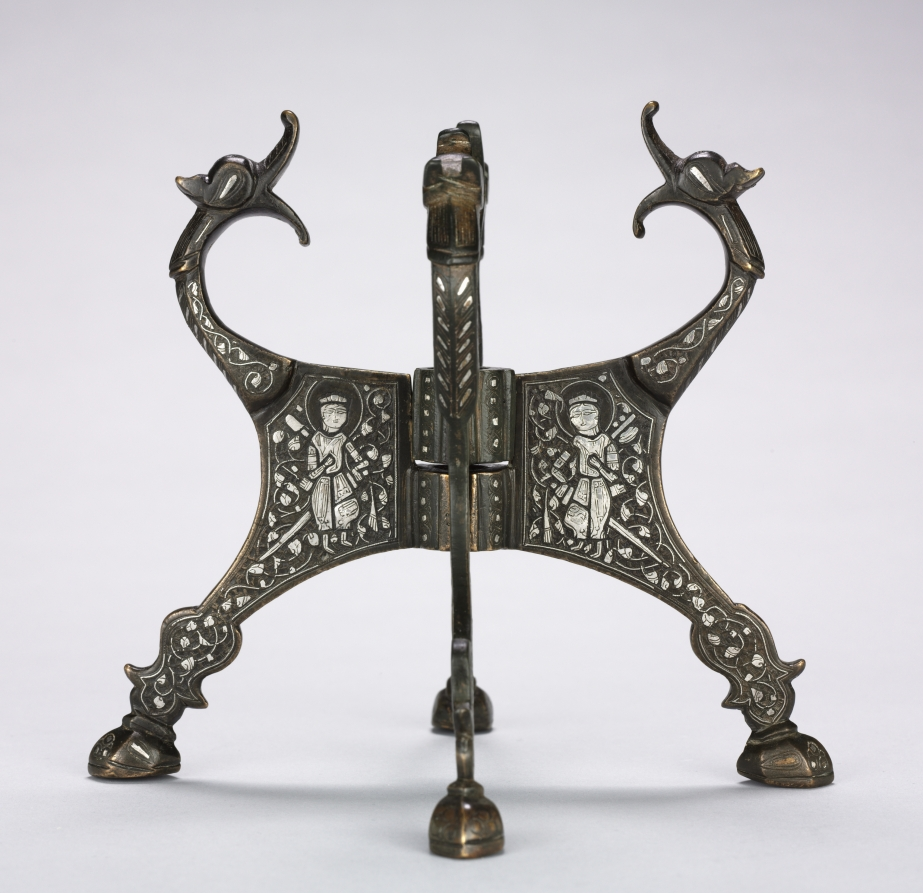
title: Dragon-headed Stand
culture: Northern Iraq or Syria, Zangid (1127–1251) or Ayyubid period (1171–1260)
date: 1200s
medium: cast brass inlaid with silver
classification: Metalwork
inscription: None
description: Themes of hunting and combat are evoked by this stand with gaping dragon heads and figures armed with swords and spears.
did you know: The four-legged stand has two interlocking parts.